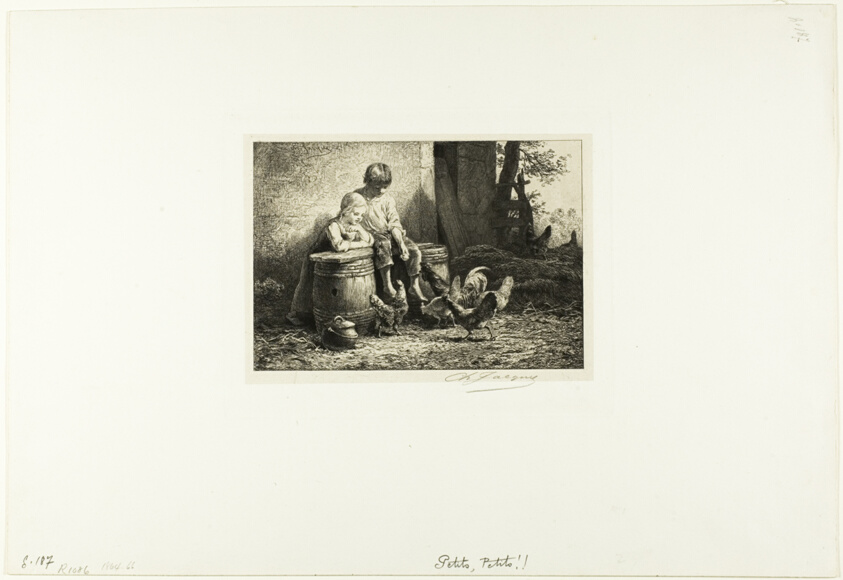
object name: Print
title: Petits! Petits!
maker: Charles Émile Jacque (French, 1813-1894)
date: c. 1865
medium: Etching, engraving and roulette on cream China paper laid down on ivory wove paper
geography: France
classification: etching; print; prints and drawing